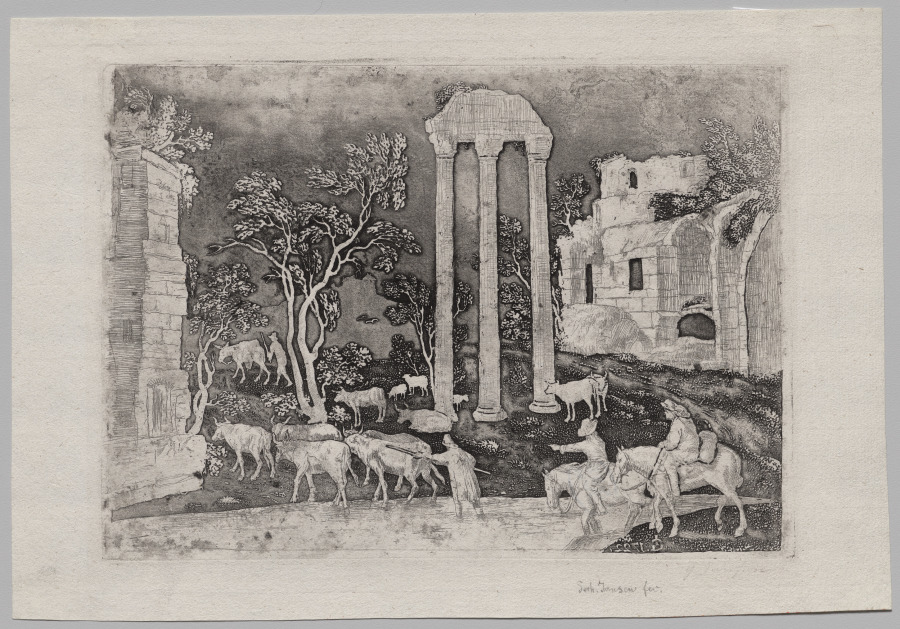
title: Pastoral Landscape with Ruins and a Ford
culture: Netherlands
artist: Gerhardt Janssen (Dutch, 1636–1725)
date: 1722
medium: etching and open-bite on laid paper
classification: Print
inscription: WATERMARK: double-headed eagle (Landscape with Ruins and a Ford); Lugt 686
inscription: Signed, lower right, in plate: JG [monogram] 1722 [in reverse]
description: Janssen’s prints depict figures, trees, and architectural details rendered light against a dark background, a reverse effect of the typical etching of the period, which reminds our modern eye of a photographic negative. The artist might have been familiar with such a reversal of light and dark through the practice of reverse glass painting, in which he was trained, and indeed, the figures glow with an idiosyncratic solarizing effect, almost as if they are part of a window. The technique was apparently invented by Janssen and is unique in early modern art.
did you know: This print was made from an iron print plate that was etched in acid in stages, creating a textured, almost corrosive effect.